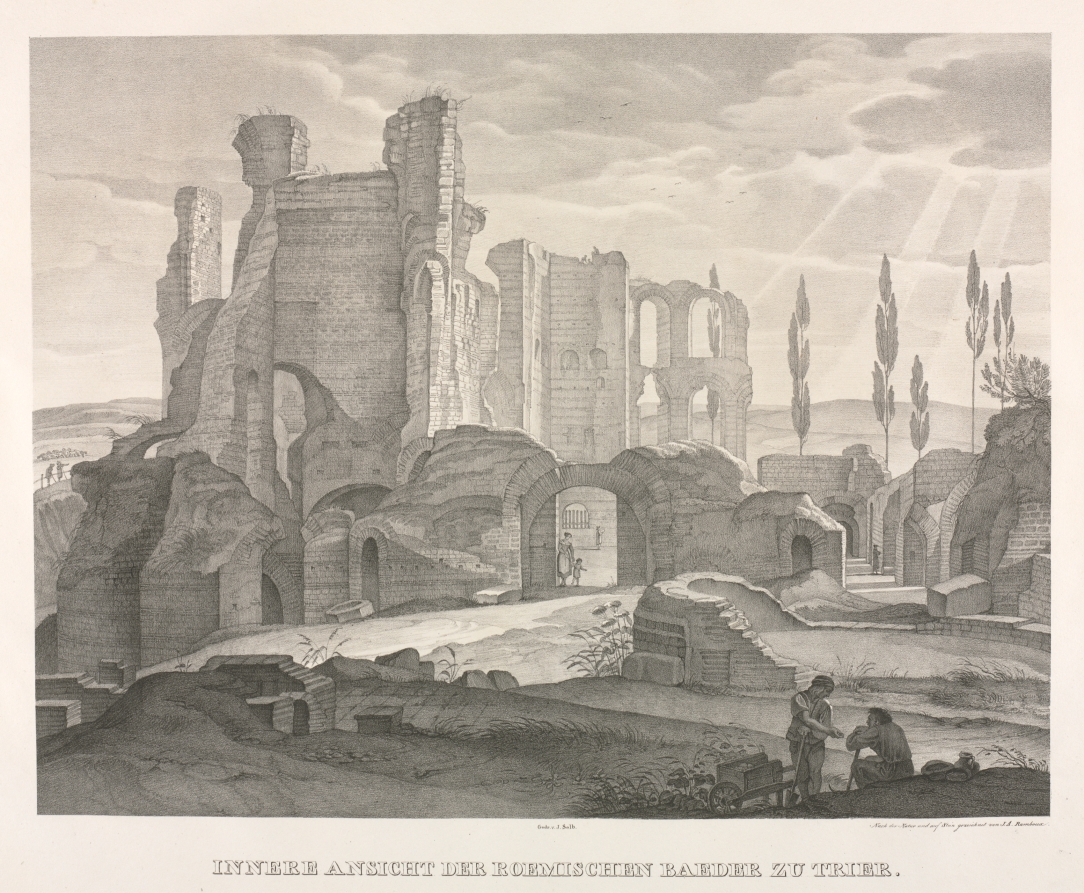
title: Interior View of the Roman Baths at Trier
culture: Germany, 19th century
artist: Johann Anton Ramboux (German, 1790–1866)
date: 1826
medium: lithograph with tint stone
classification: Print